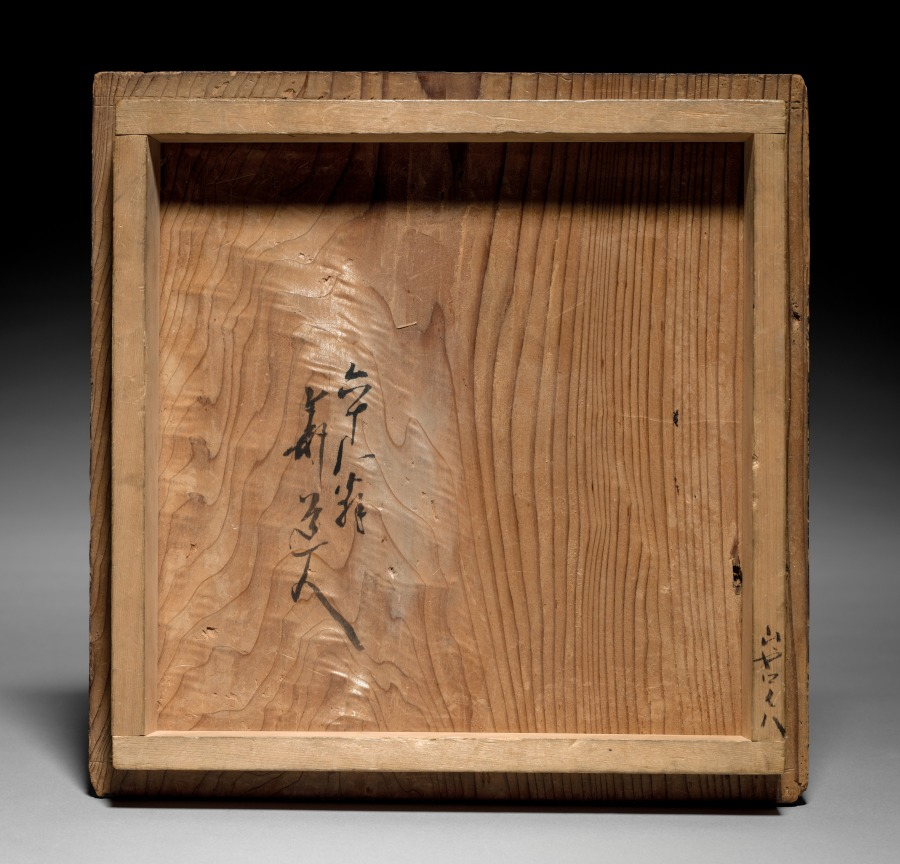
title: Water Container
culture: Japan, Momoyama period (1573–1615)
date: early 1600s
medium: glazed stoneware (Bizen ware, Imbe type)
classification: Ceramic